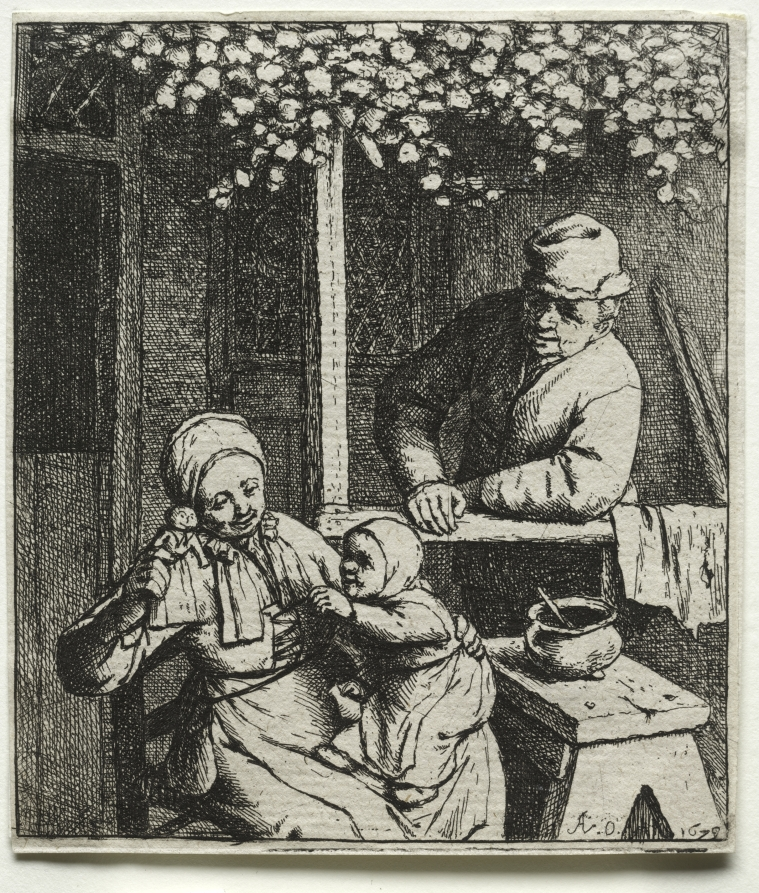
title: Asking for the Doll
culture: Netherlands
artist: Adriaen van Ostade (Dutch, 1610–1684)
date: 1678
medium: etching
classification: Print